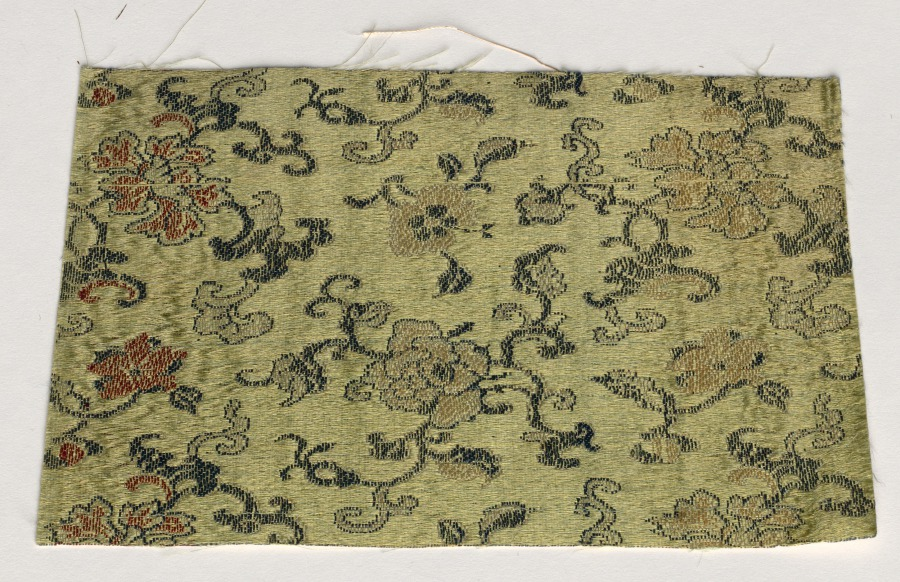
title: Fragment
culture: China, 19th century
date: 1800s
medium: satin ground; silk diasper weave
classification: Textile